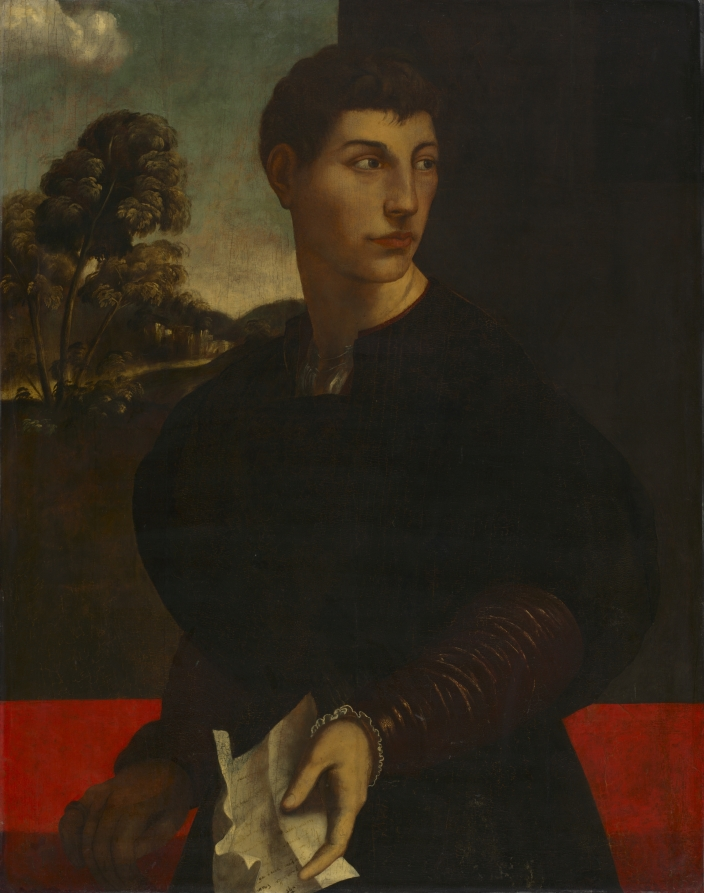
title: Portrait of a Young Man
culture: Italy, 16th century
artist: follower of Dosso Dossi (Italian, c. 1490–after 1541)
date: c. 1530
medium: oil and gold on wood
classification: Painting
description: Like other paintings from the Dossi workshop, this work conveys the sitter's social status and self-confidence. He holds a crumpled letter written in Italian. The words Asto, meaning "ship mast," and mare, meaning "sea," suggest that trade was a topic of this letter. References to anatomy and the word bella imply a discussion of the magnificence of human anatomy, an interest that spread rapidly during the Renaissance. The letter likewise communicates the young man's considerable education. This work was formerly called Portrait of Giuliano de Medici; however, the sitter's lack of resemblance to Giuliano caused art historians to discount this argument. Portrait of a Young Man was earlier attributed to Dosso's brother, Battista, before recently being considered a work by Dosso or a member of his workshop. As first suggested by Roberto Longhi, Portrait of a Young Man is now considered likely to be a work of an unidentified follower of Dossi from Friuli, Italy. The Friulian follower worked from 1510 until after 1530 and had connections to Dossi's hometown of Ferrara, accounting for this work's resemblance to Dossi's style. The dark outlines and large forms of the work are of a later style than Dossi's, suggesting that the artist was a follower rather than Dossi himself.